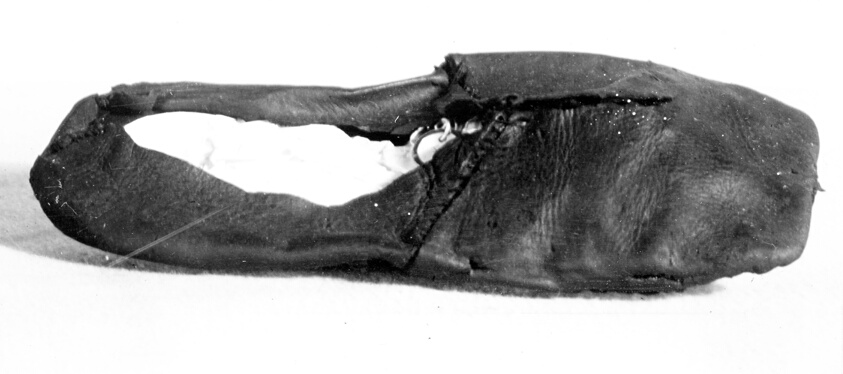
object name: Textile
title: Shoe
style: elizabethan, tudor, european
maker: England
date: 16th century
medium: Leather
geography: England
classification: textile; costume accessory - shoe; shoes - misc; costume; dress (garment); clothing